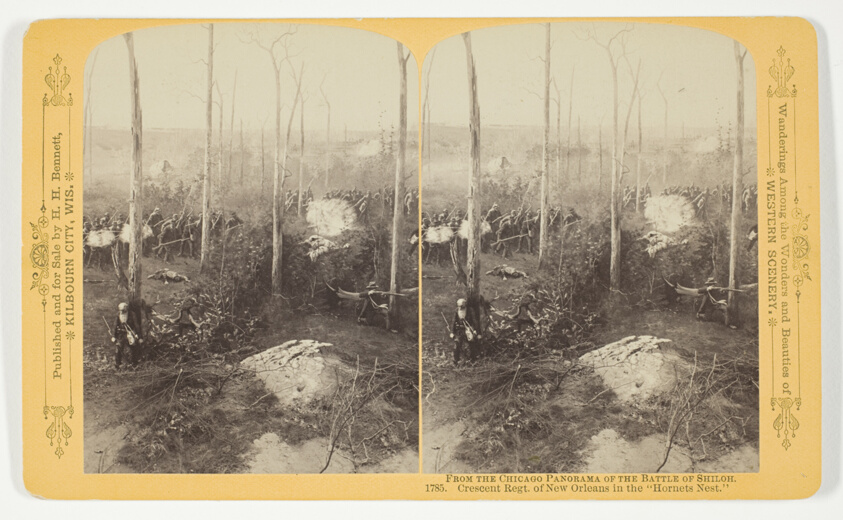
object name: Photograph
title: Crescent Regt. of New Orleans in the "Hornets Nest", from the series "The Chicago Panorama of the Battle of Shiloh"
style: 19th century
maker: Henry Hamilton Bennett (American, born Canada, 1843-1908)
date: 1887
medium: Albumen print, stereo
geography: Chicago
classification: photography; photograph; albumen silver print; stereograph (albumen)